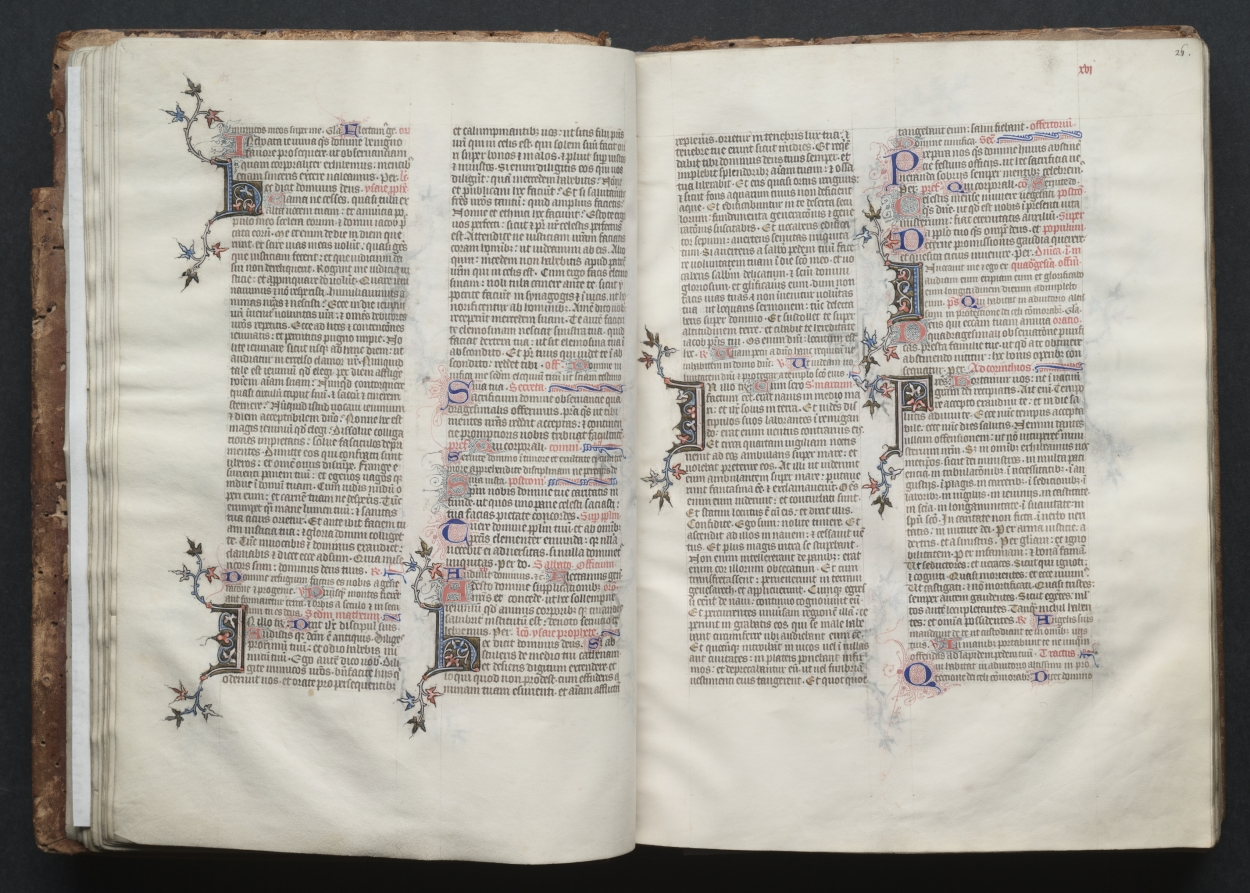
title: The Gotha Missal: Fol. 25v, Text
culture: France, Paris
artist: Master of the Boqueteaux (French)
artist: and Workshop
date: c. 1375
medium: ink, tempera, and gold on vellum; blind-tooled leather binding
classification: Bound Volume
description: The style and quality of this manuscript's decoration is typical of deluxe Parisian books made for aristocratic or royal patrons. Most of the book's decoration appears to be the work of the Master of the Boqueteaux, an artist active at the court of King Charles V (died 1380). His style was apparently shared by a number of book illuminators working in and around Paris. It is very possible that the Gotha Missal belonged to Charles V, but is not provable because the manuscript has no royal portraits and lacks a colophon. Given the book's magnificent decoration, however, it would seem that it was produced for a Valois prince, if not for the king himself. The manuscript receives its name from the German dukes of Gotha, its later owners.